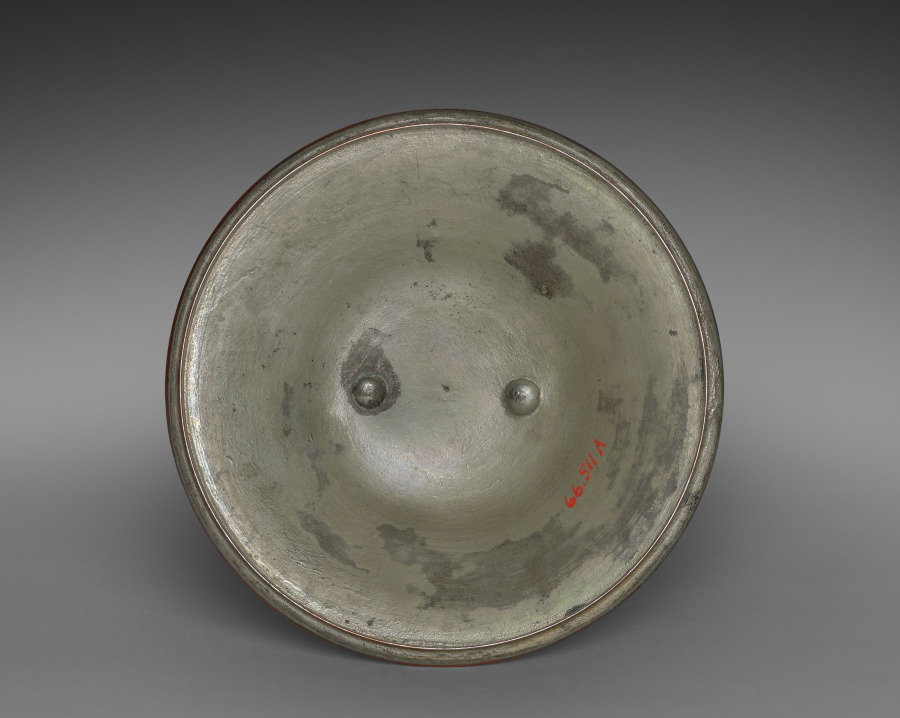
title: Cover for a Pot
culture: Russia, St. Petersburg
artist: firm of Peter Carl Fabergé (Russian, 1846–1920)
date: 1914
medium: copper with brass handles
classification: Metalwork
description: As Russia entered the First World War, austerity and economy settled into the fabric of life even among wealthy aristocrats and nobility. Not only were precious materials such as gold, silver, and gemstones hard to procure, but such luxury seemed out of place when so many men were dying at the front. Fabergé contributed to the war effort by making shells, casings, and other munitions out of brass and copper. He also made cookware, such as this small covered soup pot, to be sent to the front lines with provisions tucked inside. However, these simple forms only looked affordable. They were still a luxury only the wealthiest families could afford to send to their sons.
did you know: This lid is the cover for a copper soup pot that was sent to the front lines filled with provisions during the First World War.